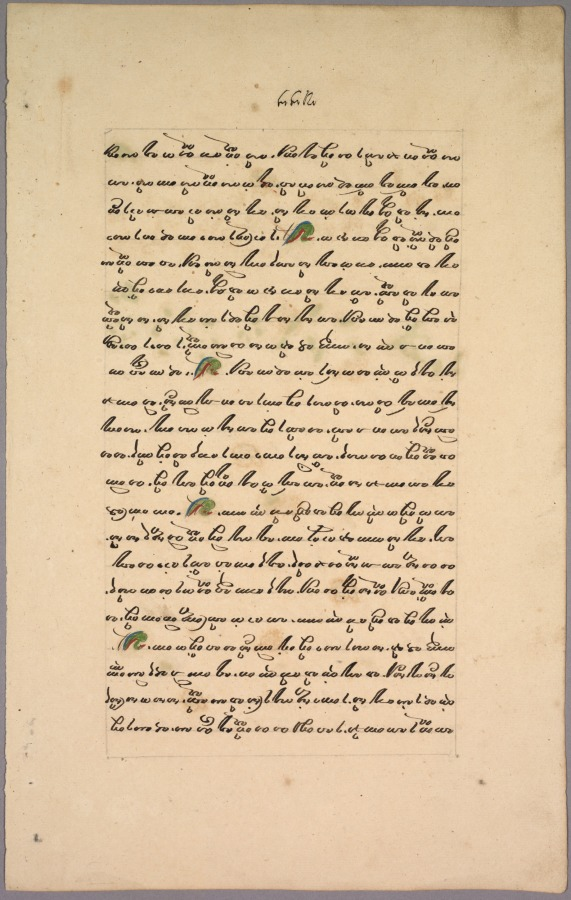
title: Pages from Ramayana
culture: Java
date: 1800s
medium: ink on paper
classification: Manuscript